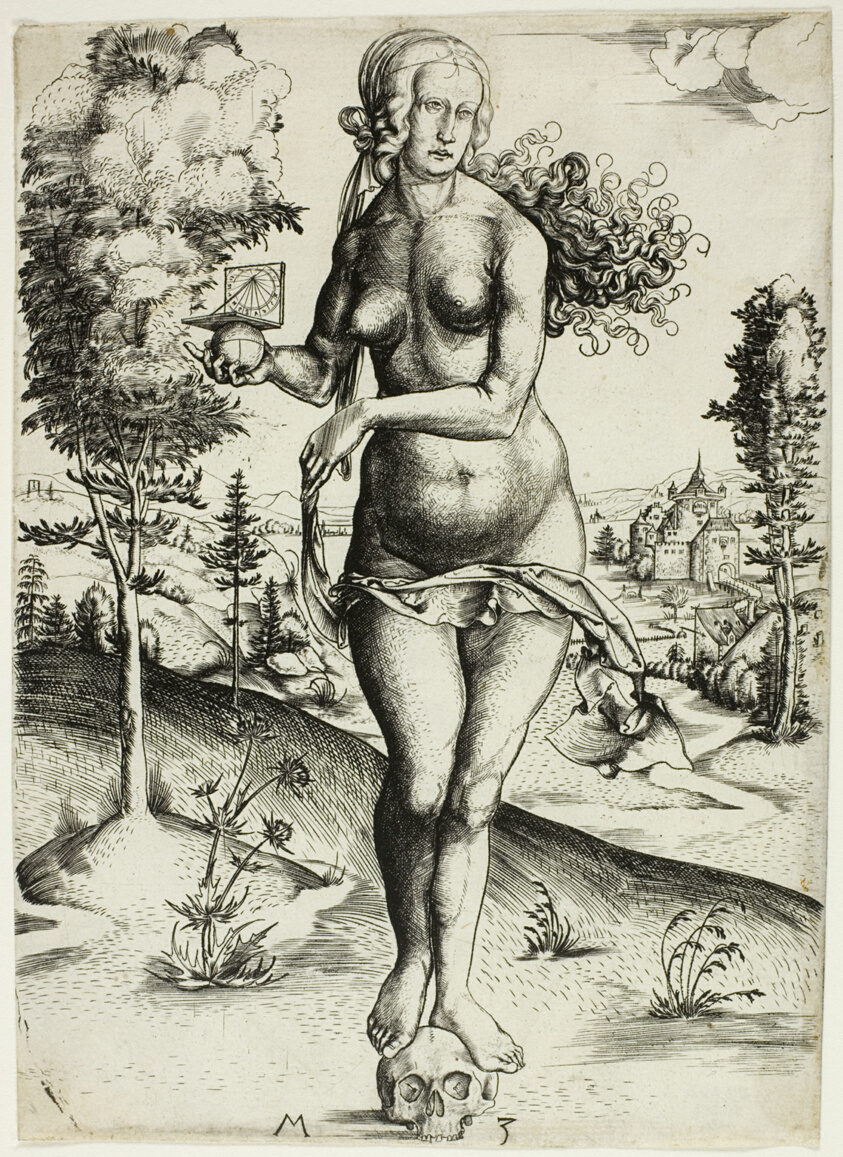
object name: Print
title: Memento Mori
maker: Master M.Z.; German, active 1500-1550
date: 1500/02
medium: Engraving in black on ivory laid paper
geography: Germany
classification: engraving; print; prints and drawing